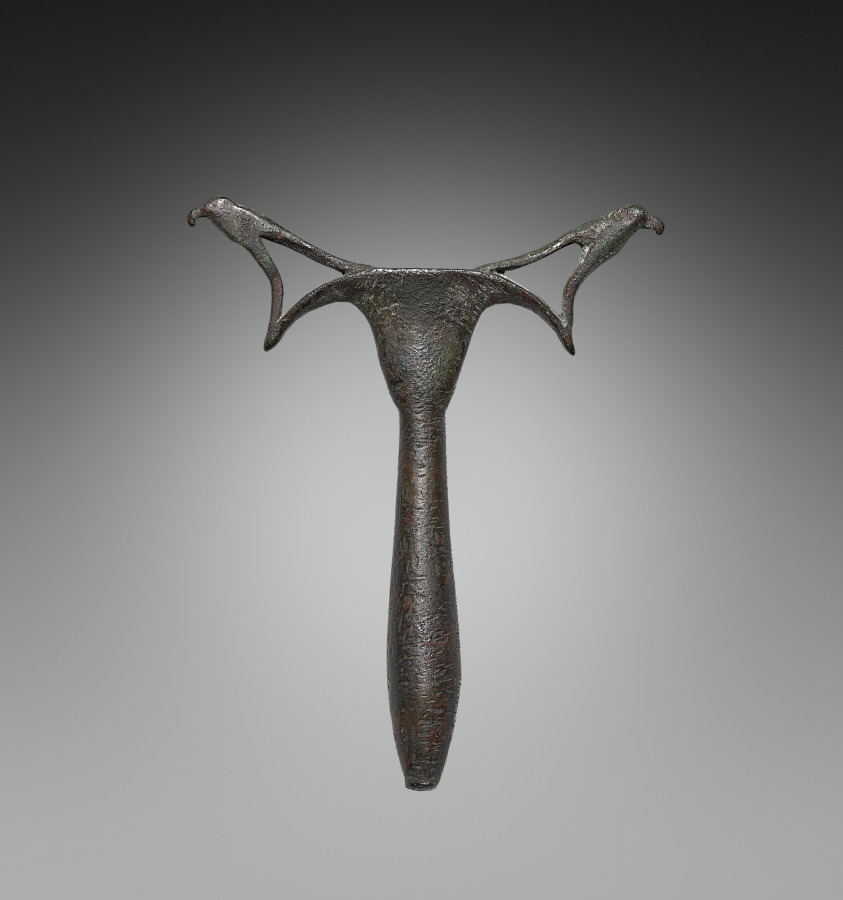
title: Mirror with Falcons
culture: Egypt, New Kingdom (1540–1069 BCE), Dynasty 18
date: 1540–1296 BCE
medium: mirror of copper, handle of tin-bronze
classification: Cosmetic Objects